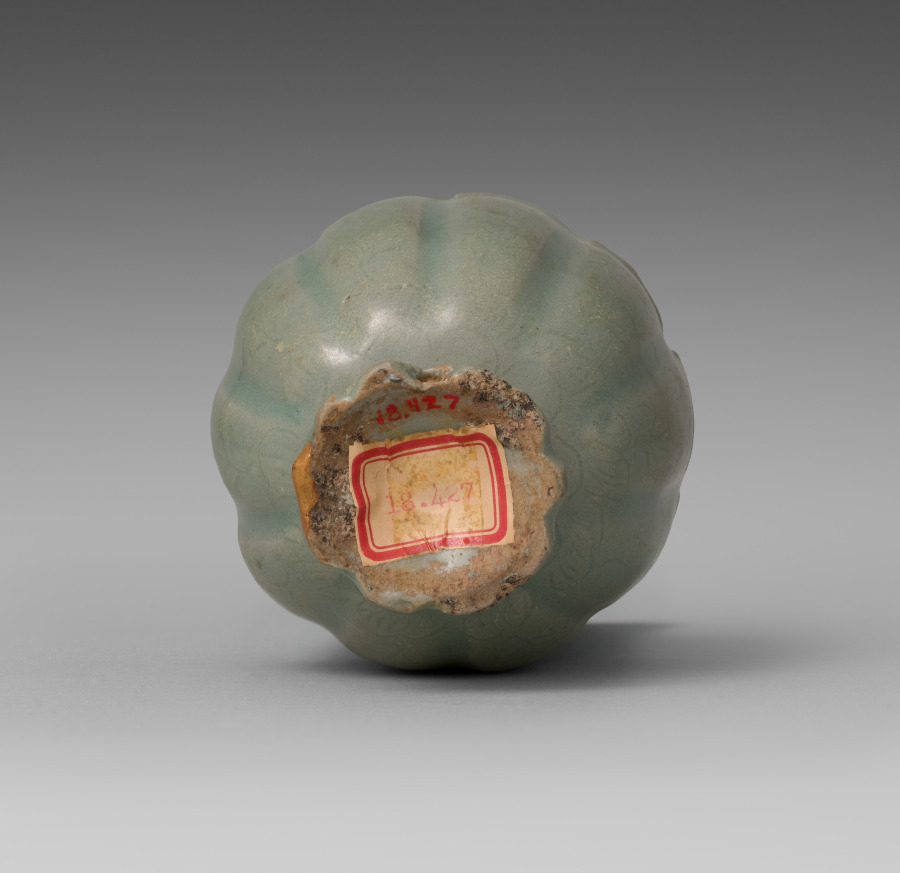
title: Floral-shaped Cup with Incised Chrysanthemum Design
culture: Korea, Goryeo dynasty (918–1392)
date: 1100s-1200s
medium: celadon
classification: Ceramic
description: Both everyday objects and ornaments such as this drinking cup were standard for Goryeo period (918–1392) burial goods. Furnishing tombs with an elaborate assemblage of objects was believed to honor and comfort the newly dead. While greenish celadon works were mainstream during the Goryeo period, bluish-white ceramic works made of white clay such as this one were produced from time to time.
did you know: Called kintsugi (literally meaning “gold joinery”) in Japanese, this method of repairing broken parts with glittering gold mixed with lacquer was extensively used for ceramic works in the Goryeo period, such as this cup.